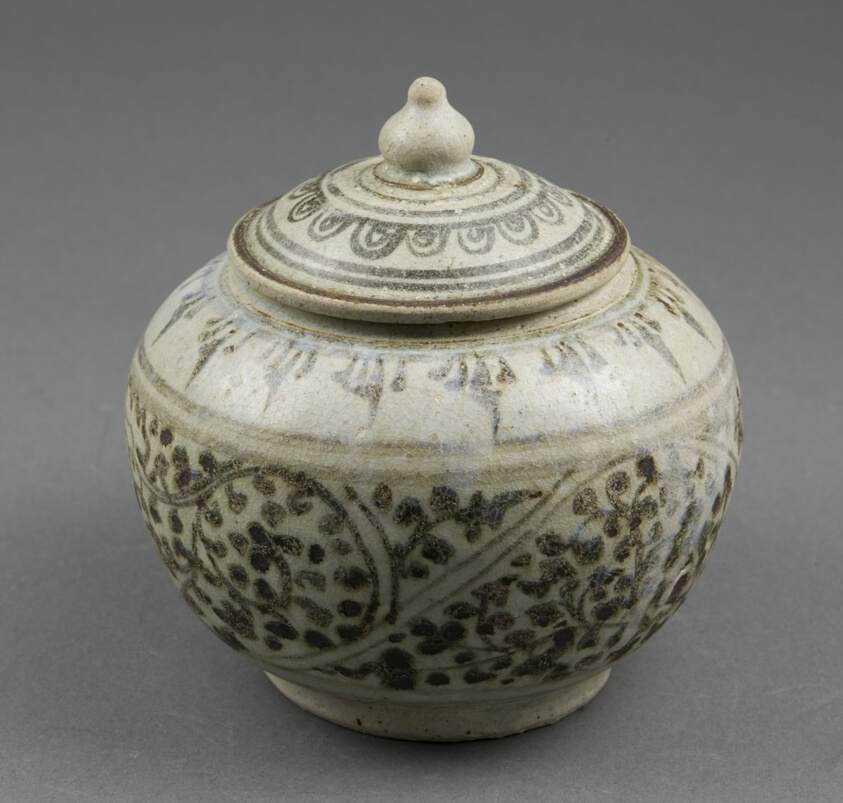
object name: Decorative Arts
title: Sawankhalok Ware Covered Box with Lotus Bud Knob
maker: Thailand, Sukhothai Province, Si Satchanalai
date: 14th/15th century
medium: Glazed stoneware with iron-brown underglaze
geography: Sawankhalok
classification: ceramics; asian art; decorative arts